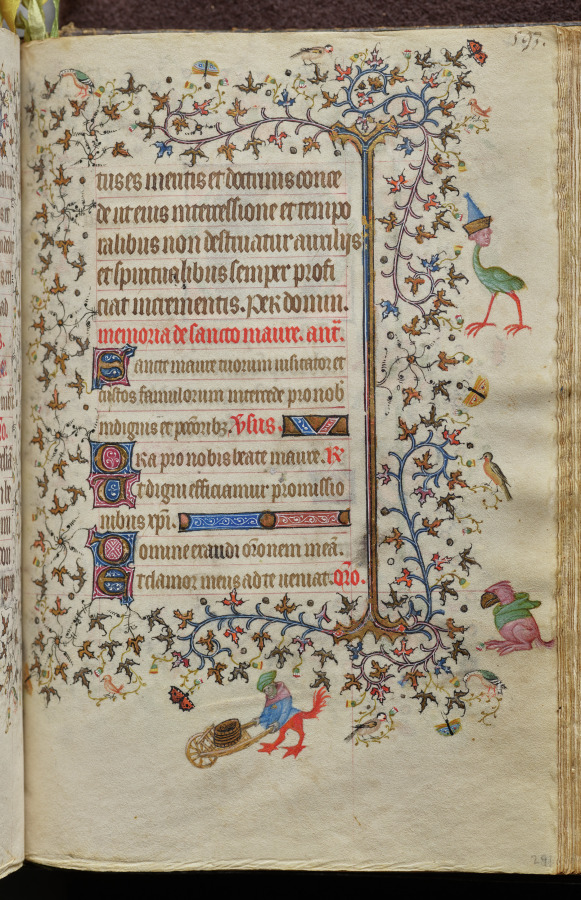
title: Hours of Charles the Noble, King of Navarre (1361-1425): fol. 291r, Text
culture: France, Paris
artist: Master of the Brussels Initials and Associates (French)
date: c. 1405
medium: ink, tempera, and gold on vellum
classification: Bound Volume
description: This precious volume was obviously highly prized by its owner, the French-born King of Navarre, who had his coat of arms painted on no less than twenty folios. Rather than directly commissioning this manuscript from a specific workshop, it seems that Charles the Noble acquired his book of hours -- perhaps ready-made for the luxury market -- while on a trip to Paris in 1404-05. A collaborative effort, six painting styles are evidenced within the pages of this codex, those of two Italians, two Frenchmen, and two Netherlanders. The painter who was responsible for the planning and decoration of the book, and who produced seventeen of the large miniatures, was a Bolognese artist known as the Master of the Brussels Initials. His principal assistant, responsible for most of the borders, was a Florentine who signed his name "Zecho" da Firenze on folio 208 verso.